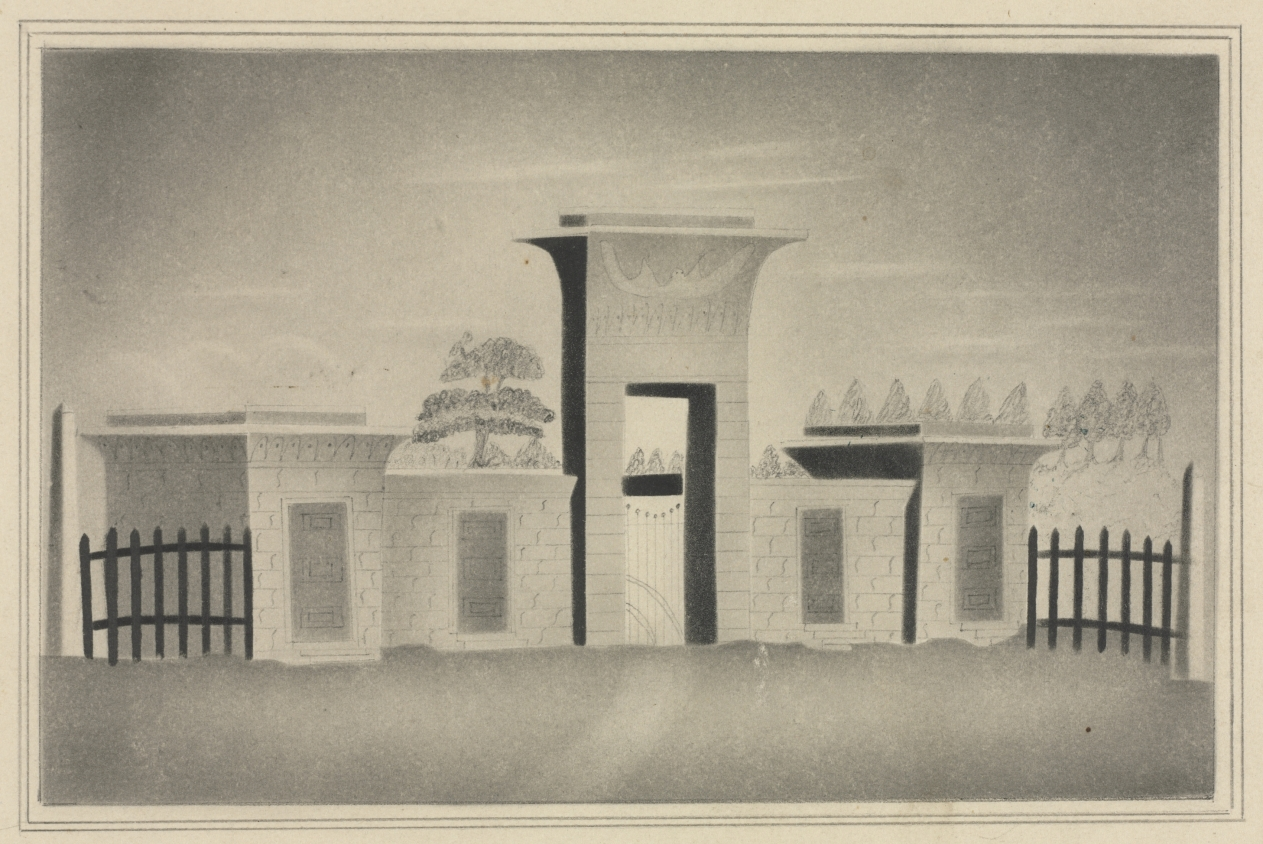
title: The Gateway of Mount Auburn, near Boston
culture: America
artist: Mary Altha Nims (American, 1817–1907)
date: 1800s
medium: pencil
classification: Drawing